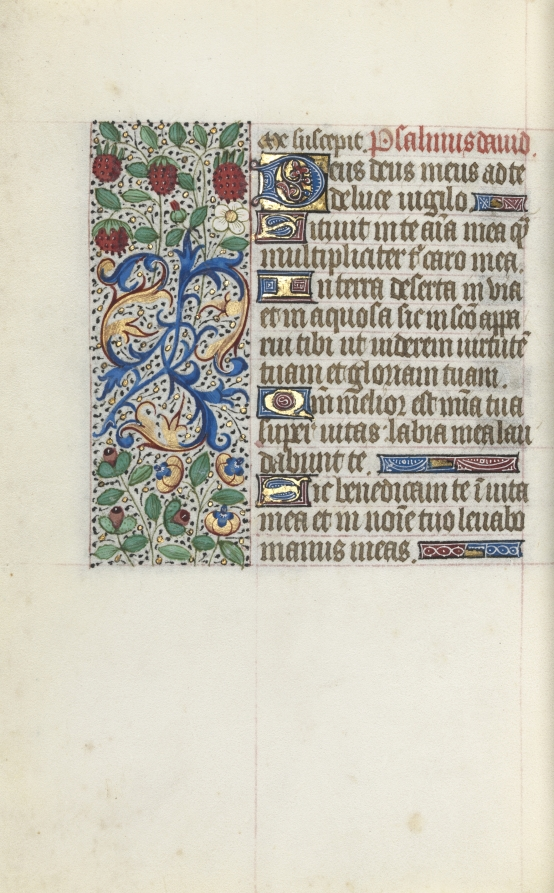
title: Book of Hours (Use of Rouen): fol. 137v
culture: France, Rouen, 15th century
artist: Master of the Geneva Latini (French, active Rouen, 1460–80)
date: c. 1470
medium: ink, tempera, and gold on vellum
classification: Bound Volume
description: In the late 1400s and early 1500s Rouen was an established and important center of book production. The city’s cathedral had a wealthy chapter that spent large sums of money to commission books and to maintain its extensive library. The stationers and booksellers would have likely been concentrated in or near the cathedral precinct. This artist, named after a manuscript now in Geneva, was Rouen’s principal illuminator during the second half of the 1400s.